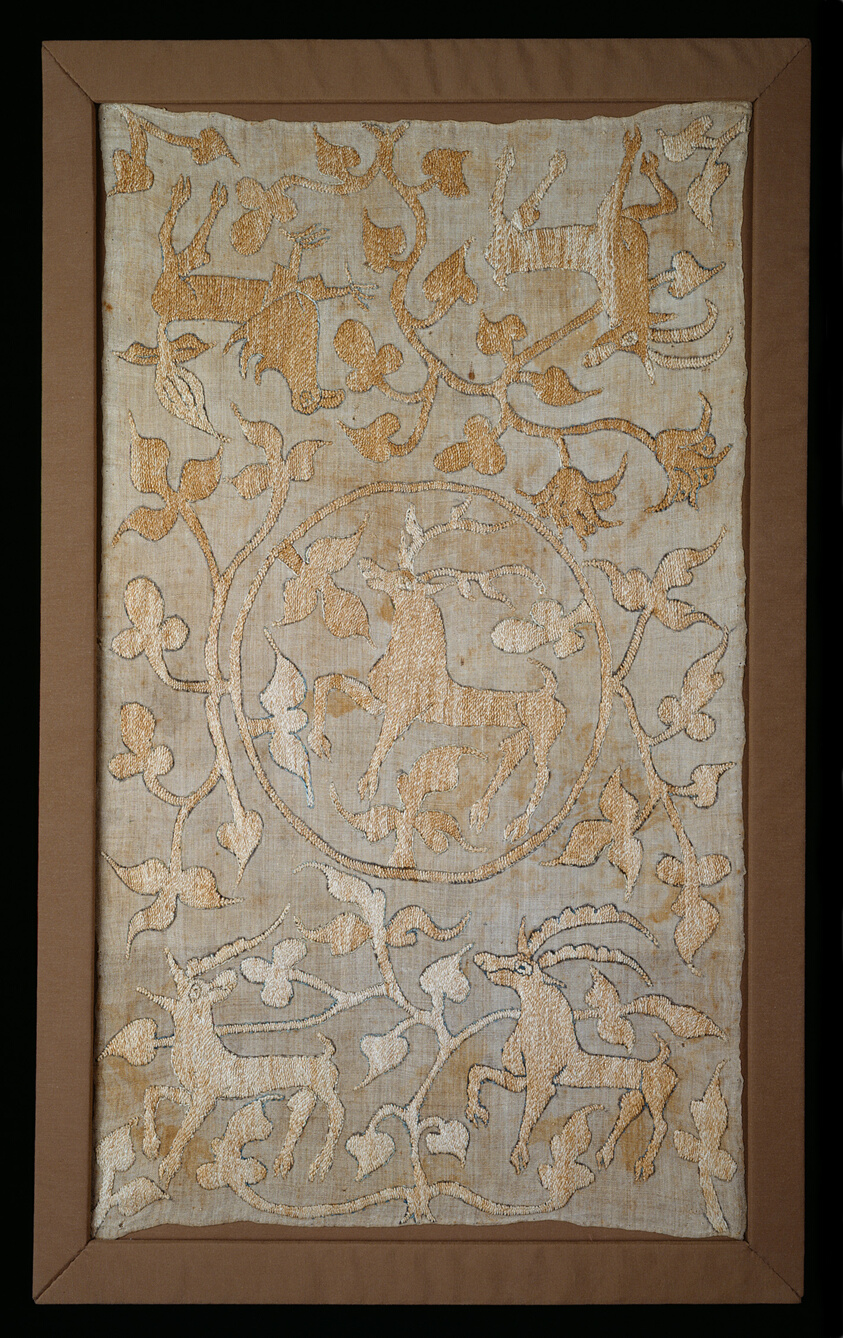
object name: Textile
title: Panel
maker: Switzerland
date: 15th century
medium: Linen, plain weave; embroidered with silk and linen in Roumanian and stem stitches; laid work and couching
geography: Switzerland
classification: textile; needlework (visual works)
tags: mythology, circles, foliage